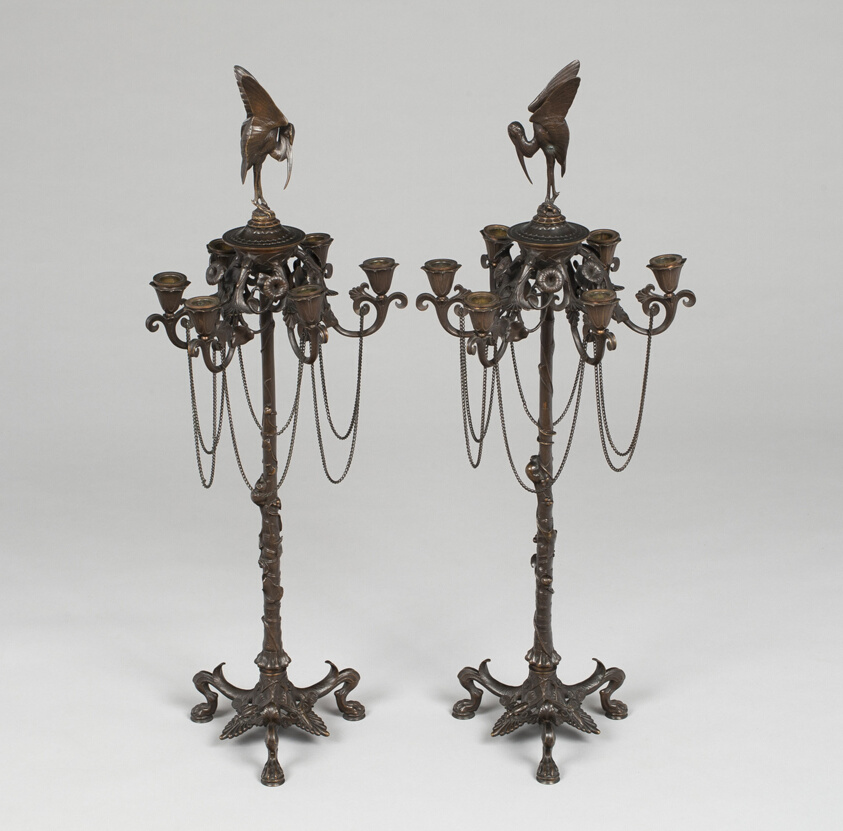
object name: Metalwork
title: Pair of Candelabra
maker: Auguste Cain (French, 1821-1894)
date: c. 1880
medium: Bronze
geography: France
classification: candleholder - candelabra; candleholder; bronze; metalwork; european decorative arts